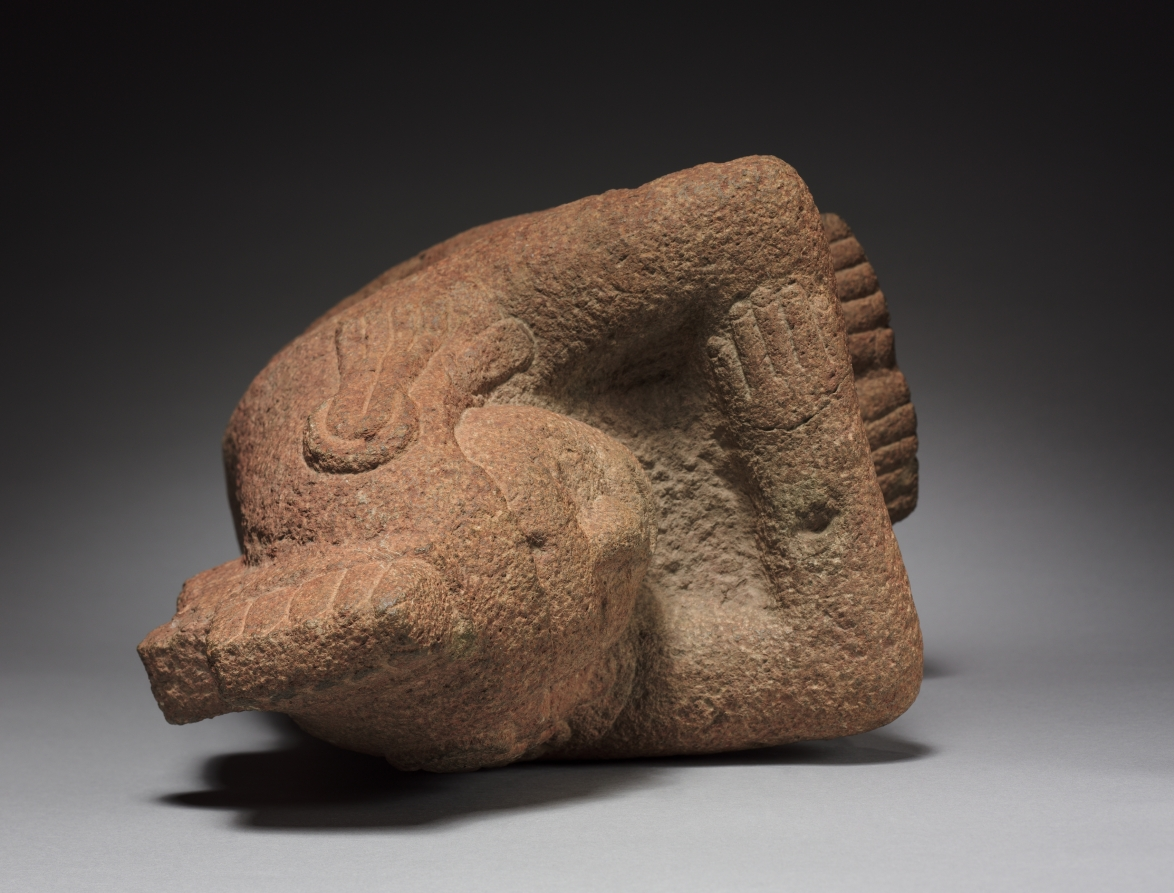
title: Seated Deity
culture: Mexico, Aztec, Valley of Mexico near Teotihuacan, Macuilxochitl (?), 14th-16th century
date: 1350–1519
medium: gray volcanic stone with red pigment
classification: Sculpture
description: The crested headdress with tassels suggests that this youthful, seated male is Macuilxochitl (Five Flower), an Aztec supernatural patron of many forms of pleasure, among them music, dance, feasting, games, and sex. His cult was popular among common people, and this effigy probably was created for use in a small neighborhood temple. The stone surface could have been plastered and then brightly painted.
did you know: The Aztecs associated the number 5 with excess: there were five gods of pleasure, one named “Five Flower.”